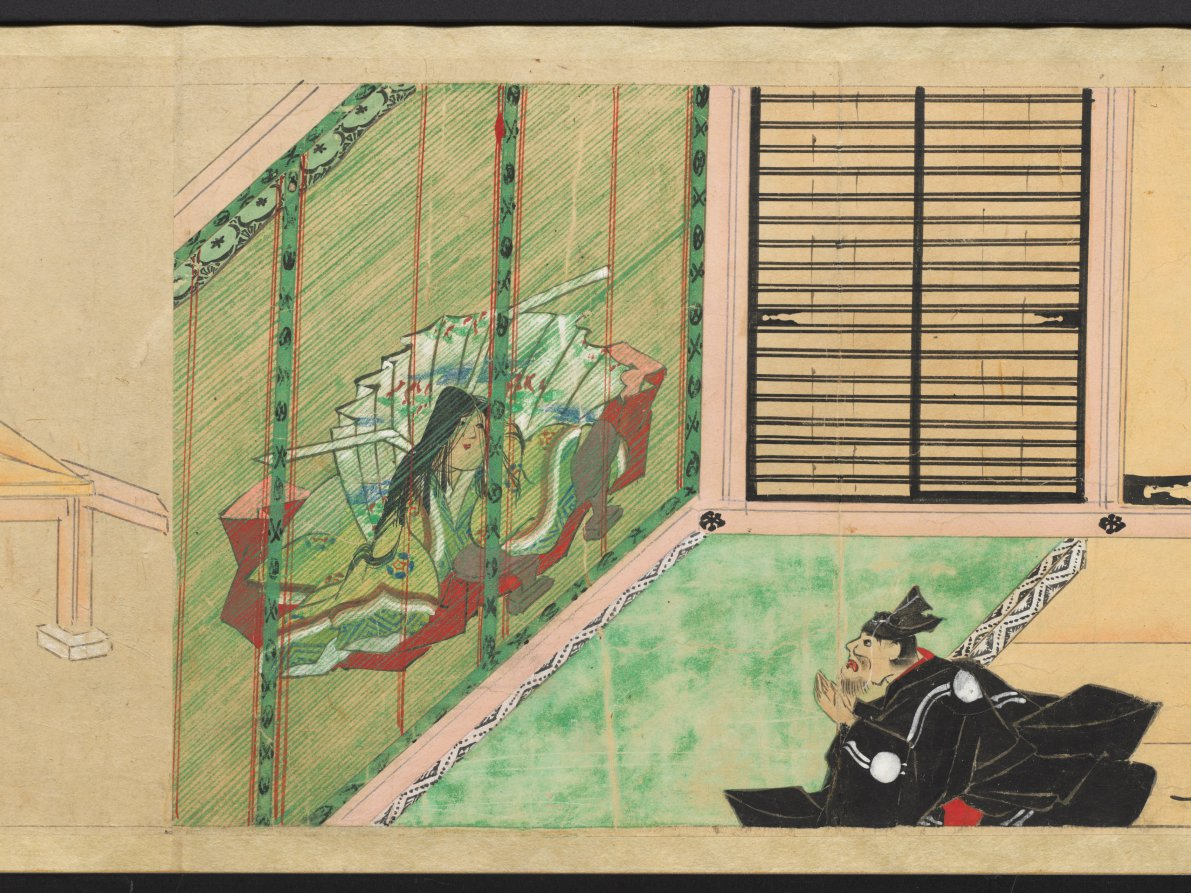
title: The Saltmaker's Story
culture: Japan, Edo period (1615–1868)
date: early 1600s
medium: One of a pair of handscrolls; ink, color, and gold on paper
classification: Painting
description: Once read and copied by girls at New Year’s celebrations and included in dowries, The Saltmaker’s Story is a rags-to-riches tale in which daughters are gifts from the gods. Despite his simple outlook, the main character progresses from humble roots as an associate at Kashima Shrine to the elite status of grandfather of the emperor through the intervention of the Kashima deity. The Saltmaker’s Story is traditionally presented in a set of three scrolls, but the text of this set has been removed by a previous owner, who remounted the illustrations as a pair. The paintings of this one take us from right to left through the second half of the tale.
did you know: This handscroll originally had texts before its paintings, but the texts were removed.